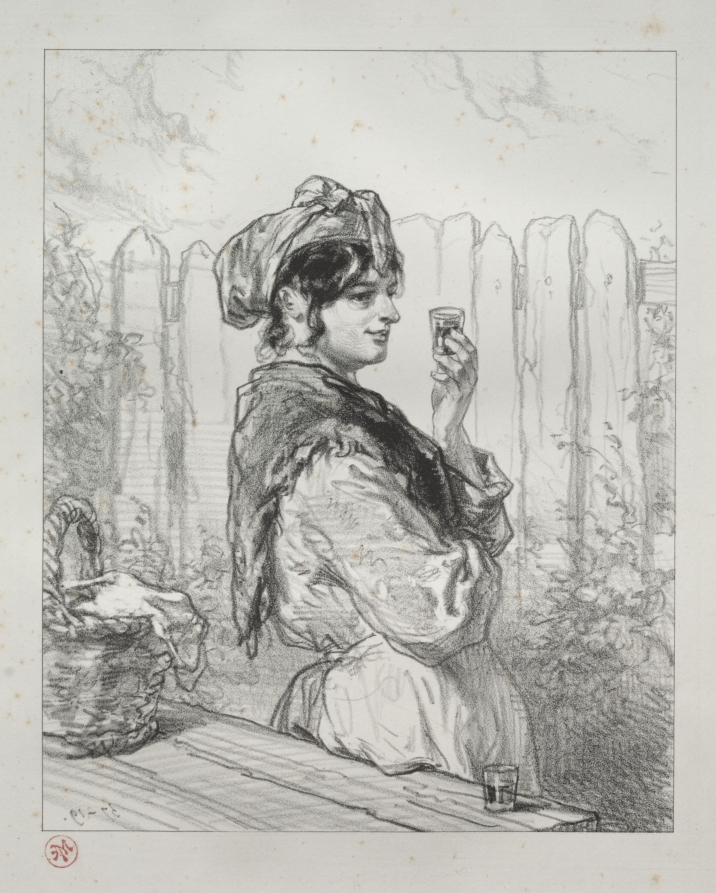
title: The Brandied Peach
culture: France, 19th century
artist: Paul Gavarni (French, 1804–1866)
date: c. mid-1800s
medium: lithograph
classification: Print